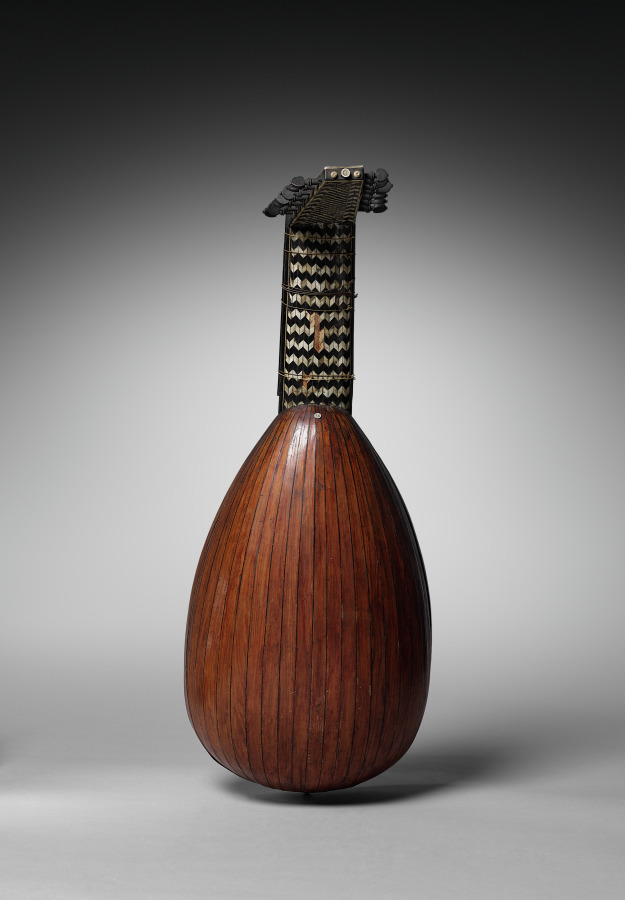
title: Lute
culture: Italy, Venice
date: c. 1550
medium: wood, laminated parchment?, sound hole, bone, ebonized wood, and mother of pearl inlay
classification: Musical Instrument